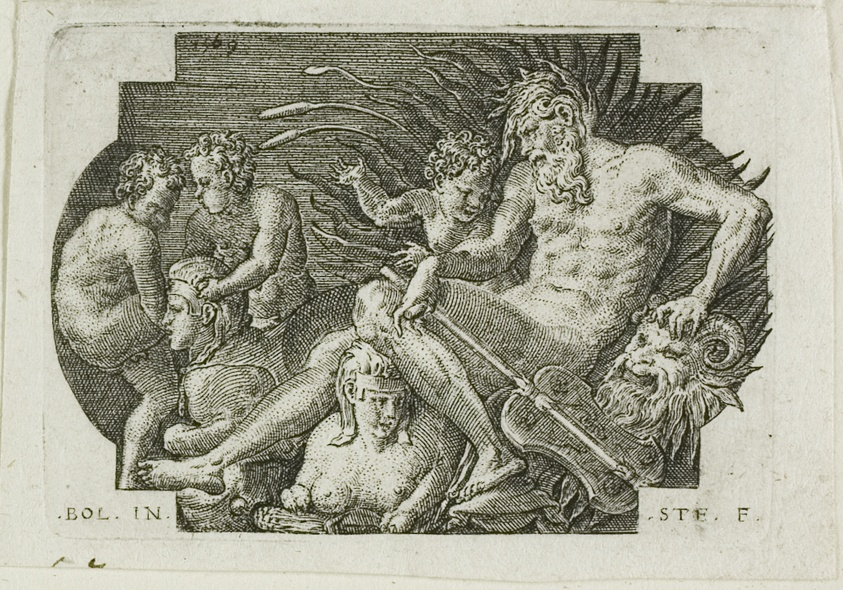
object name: Print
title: The River Nile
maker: Etienne Delaune; French, c. 1519-1583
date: 1569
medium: Engraving on paper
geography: France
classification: engraving; print; prints and drawing